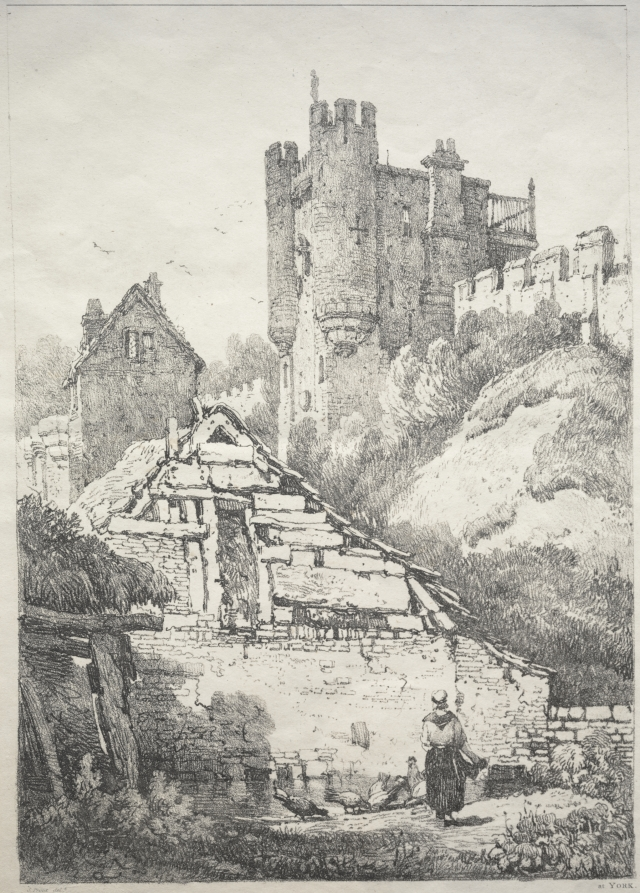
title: A Series of Ancient Buildings and Rural Cottages in the North of England: At York, Farmyard with Chickens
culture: England, 19th century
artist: Samuel Prout (British, 1783–1852)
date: 1821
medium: softground etching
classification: Print